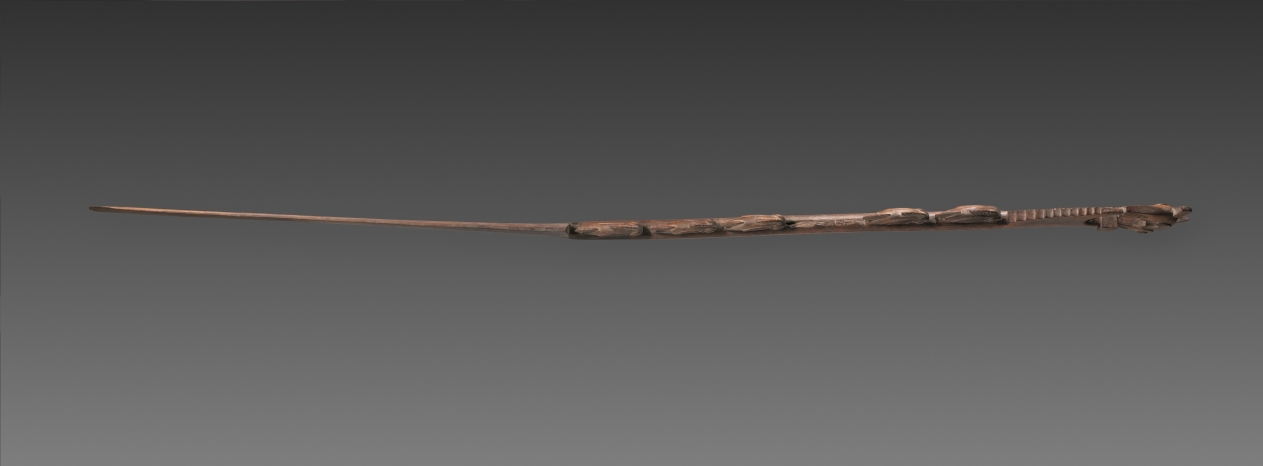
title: Carved Board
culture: Peru, South Coast, Ica Valley, 15th-16th century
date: 1400s-1500s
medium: wood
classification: Sculpture